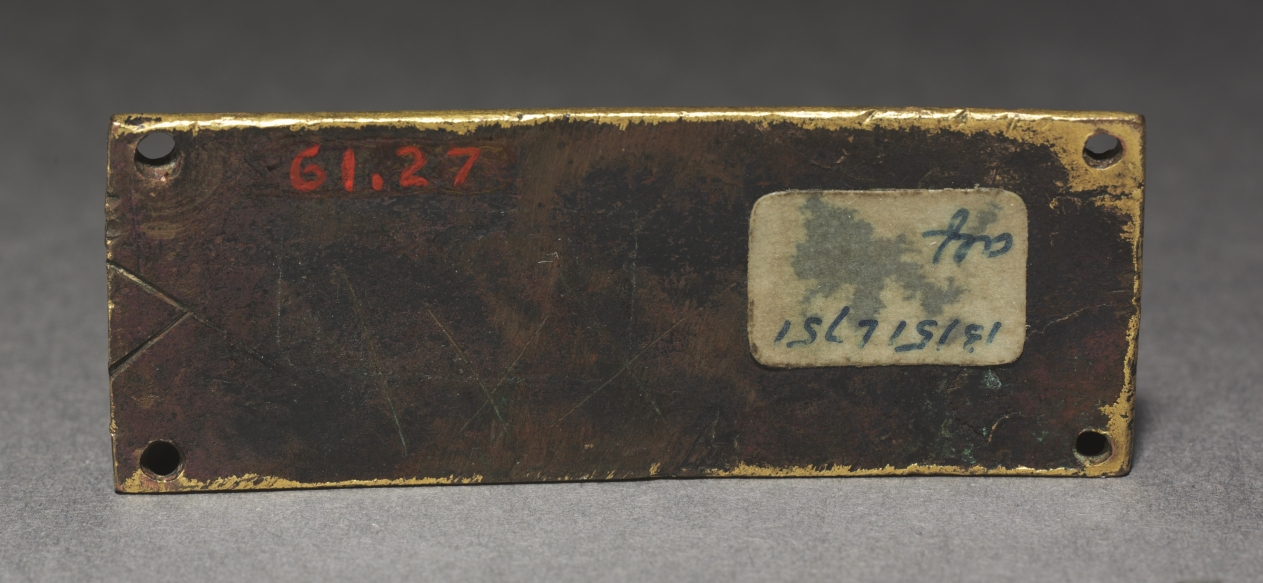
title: Plaque from a Reliquary Shrine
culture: Germany, Rhine Valley, Cologne, Romanesque period, 12th century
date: c. 1170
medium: gilded copper; champlevé and cloisonné enamel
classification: Enamel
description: These decorative enamel plaques (1953.274, 1953.638, 1957.502, and 1961.27) have been linked to some of Cologne's most important reliquary shrines, namely the shrine of the Three Kings at Cologne Cathedral and the shrines of Saints Maurinus and Albinus in the Benedictine abbey church of Saint Panteleon.